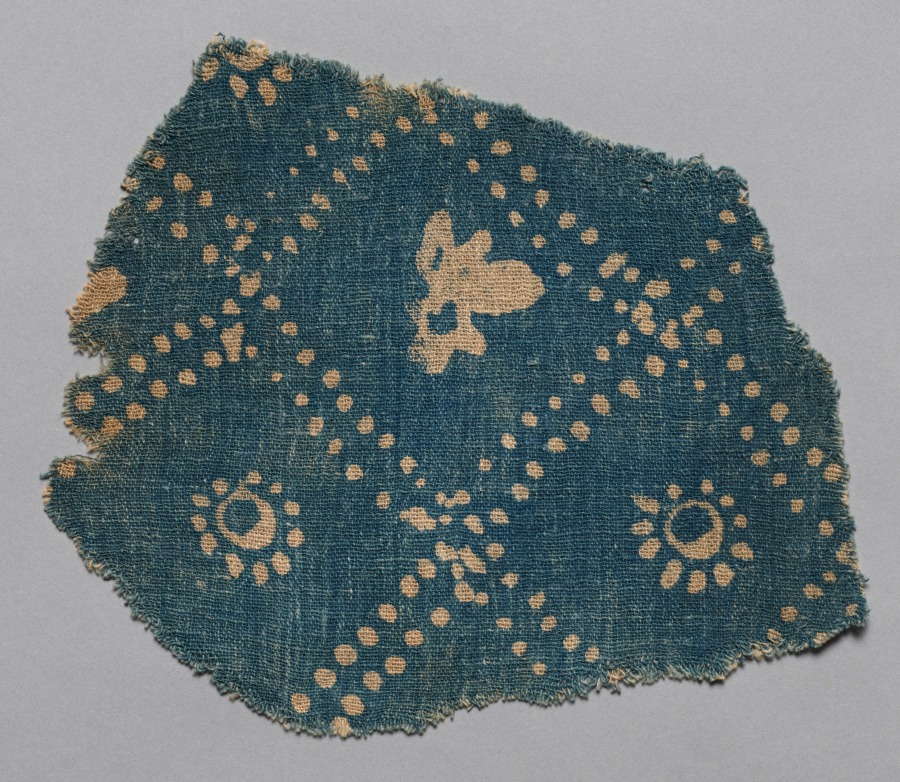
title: Fragment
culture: India, 12th-14th century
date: 1100s - 1300s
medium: plain cloth, resist dyed; cotton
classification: Textile